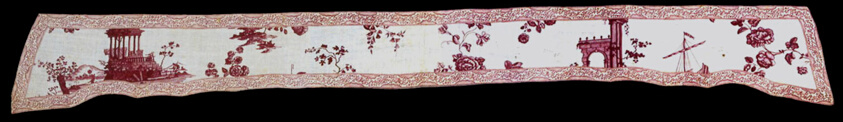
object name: Textile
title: Valance (Furnishing Fabric)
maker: Designed by John Munns (English, active 1768–1784); England, Kent, Crayford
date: 1770s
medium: Cotton, plain weave; copperplate printed; edged with cotton, plain weave; copperplate printed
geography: Crayford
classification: textile; weaving - printed; furnishing textile